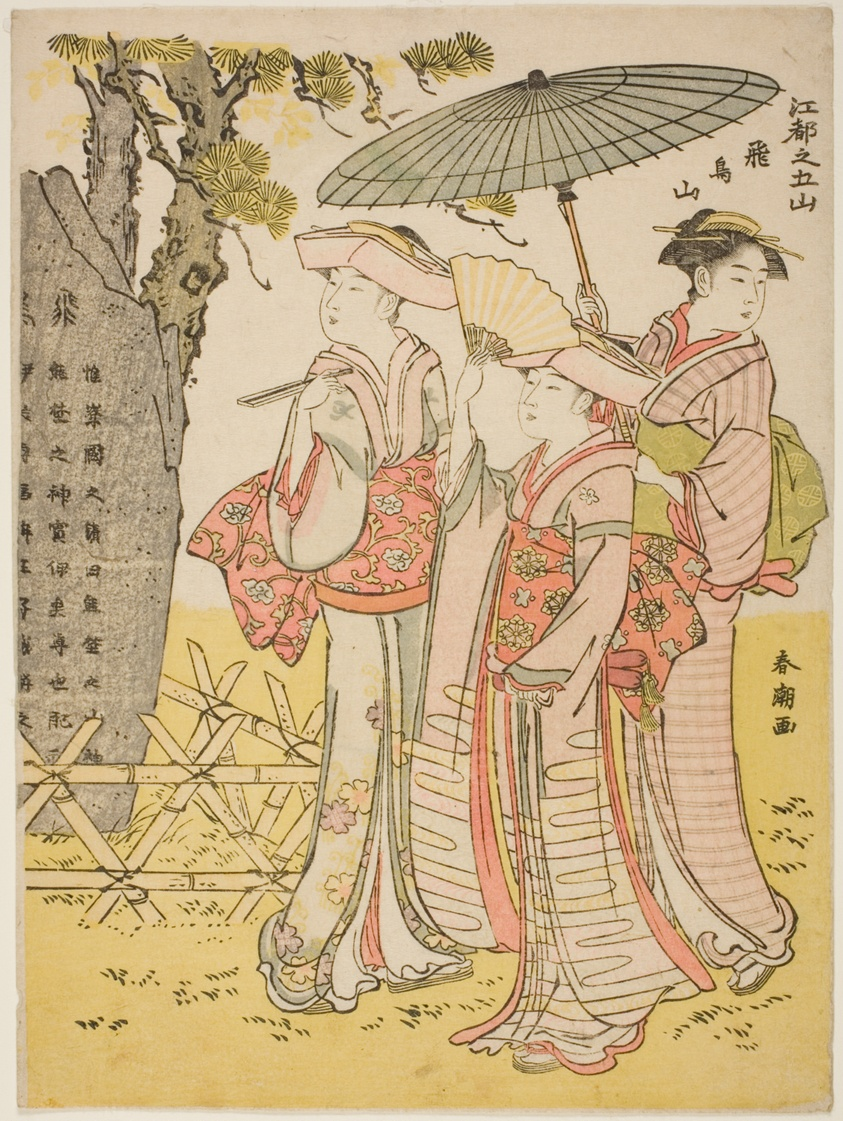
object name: Print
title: Asuka Hill (Asukayama), from the series "Five Hills of Edo (Koto no gozan)"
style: Japanese (culture or style)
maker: Katsukawa Shuncho; Japanese, active c. 1780-1801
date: c. 1780/1801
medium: Color woodblock print; chuban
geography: Japan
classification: woodblock print; print; asian art